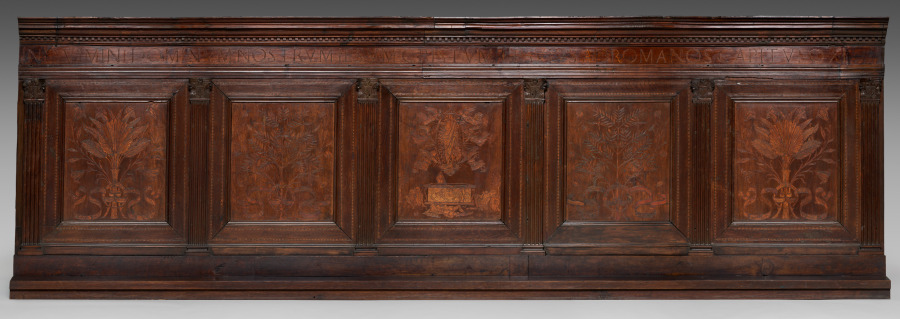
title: Upper Paneling from a Sacristy Armoire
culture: Italy, Florence, late 15th century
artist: attributed to Giuliano da Maiano (Italian, 1432–1490)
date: c. 1460–1475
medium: walnut, inlaid with holly and ebony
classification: Furniture and woodwork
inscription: in four of the five panels is the Medici badge of a jeweled ring wound with a ribbon or bannerole, on which is inscribed the motto "Semper." The frieze in the cornice contains part of a quotation from the Vulgate, Paul's epistle to the Romans, Chapter XI.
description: The imagery on the inset panels is the result of a technique known as intarsia, the skilled inlaying of woods of different colors to create a type of mosaic, popular during the 15th and 16th centuries in Italy for the decoration of paneling and furniture for studies, small rooms, and church sacristies. This large set of five intarsia panels comes from an unknown Florentine church. In its original setting the panels rested upon a row of similarly decorated cupboards (a sacristy armoire) which were used for the storage of liturgical vestments and books. This panel would have therefore been seen at eye level. The central panel depicts the Resurrection of Christ. The two outside panels depict the emblem of Lorenzo de Medici-three plumes encircled by a jeweled ring above a scrolling ribbon containing the Latin word SEMPER (Always). Lorenzo de Medici (1449-92) was the ruler of Florence when this sacristy armoire was constructed and was the likely patron. It seems to be the work of Giuliano da Maiano, an architect and intarsia-maker also responsible for the intarsia in the sacristy of Florence Cathedral.